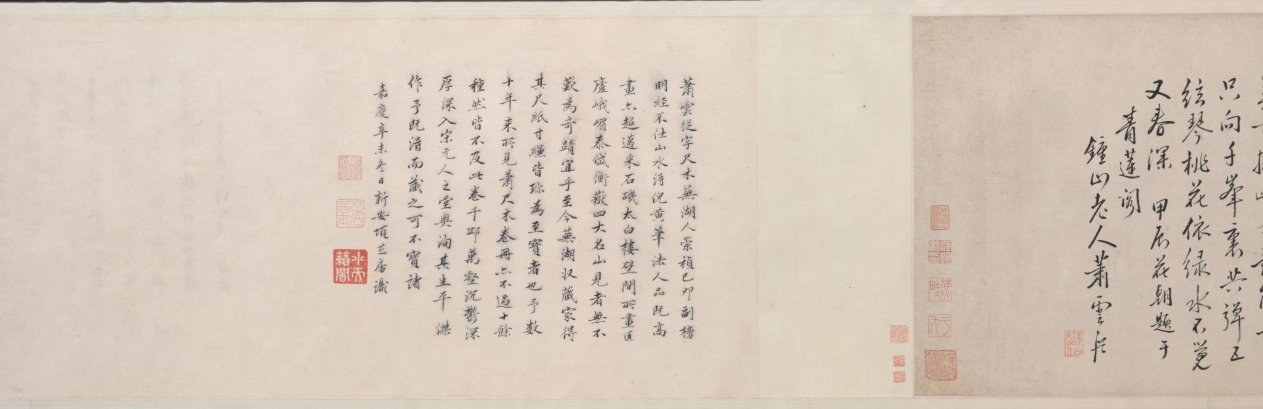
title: Pure Tones among Hills and Waters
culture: China, Qing dynasty (1644-1911)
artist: Xiao Yuncong (Chinese, 1596–1673)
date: 1664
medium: Handscroll; ink and light color on paper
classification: Painting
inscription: 種松發秀色，具是高人心。/ 鑿石築茅屋，長年覆綠陰。/ 白雲無意出，舒卷趨空林。/ 萬籟時一寂，微風墮清音。/ 此情莫可擬，此景誰能論。/ 只向千峰裏，共彈五絃琴。/ 桃花依綠水，不覺又春深。 甲辰花朝題于青蓮閣, 鐘山老人蕭雲從。[印] 鐘山老人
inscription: Title and inscription, dated 1744, and 3 seals of Shen Feng 沈鳳 (1685-1755).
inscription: 4 colophons and 24 additional seals: 1 colophon, dated 1811, and 5 seals of Xiang Yuan 項源 (active about 1811); 1 colophon, dated 1858, and 2 seals of Qi Junzao 祁寯藻 (1793-1866); 1 colophon and 4 seals of Zhang Yunzhong 張允中 (1881–1960?); 4 seals of Jiang Xun 江恂 (active about 1753–after 1780); 1 colophon dated 1943, and 2 seals of Wang Shaoming 汪兆銘 (Wang Jingwei 汪精衛, 1883–1944); 1 seal of Qi Zhiliu 祁之鏐 (active about 1858); 2 seals of Yu Zhimeng 俞芷盟 (second half of 19th century); 4 seals unidentified.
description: Painted at age 68, this landscape is one of Xiao Yuncong’s most mature works. Extraordinary in its combination of fine details with bold brushstrokes and bluish washes, it is also one of his longest compositions in handscroll format, extending over 23 feet. Throughout his lifetime, Xiao visited Nanjing and Yangzhou, where he met with other painters and literati. Regarded as the founder of the Gushu school (姑孰派) of painting, Xiao painted from nature, and his landscapes are informed by his travels, as well as by his experience as a print designer.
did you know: Biographical notes on Xiao Yuncong relate that he did not pursue the career of an official, but "furnished a cottage in the eastern suburbs [of Wuhu in Anhui province] and amused himself playing the qin (zither) and reading every day."